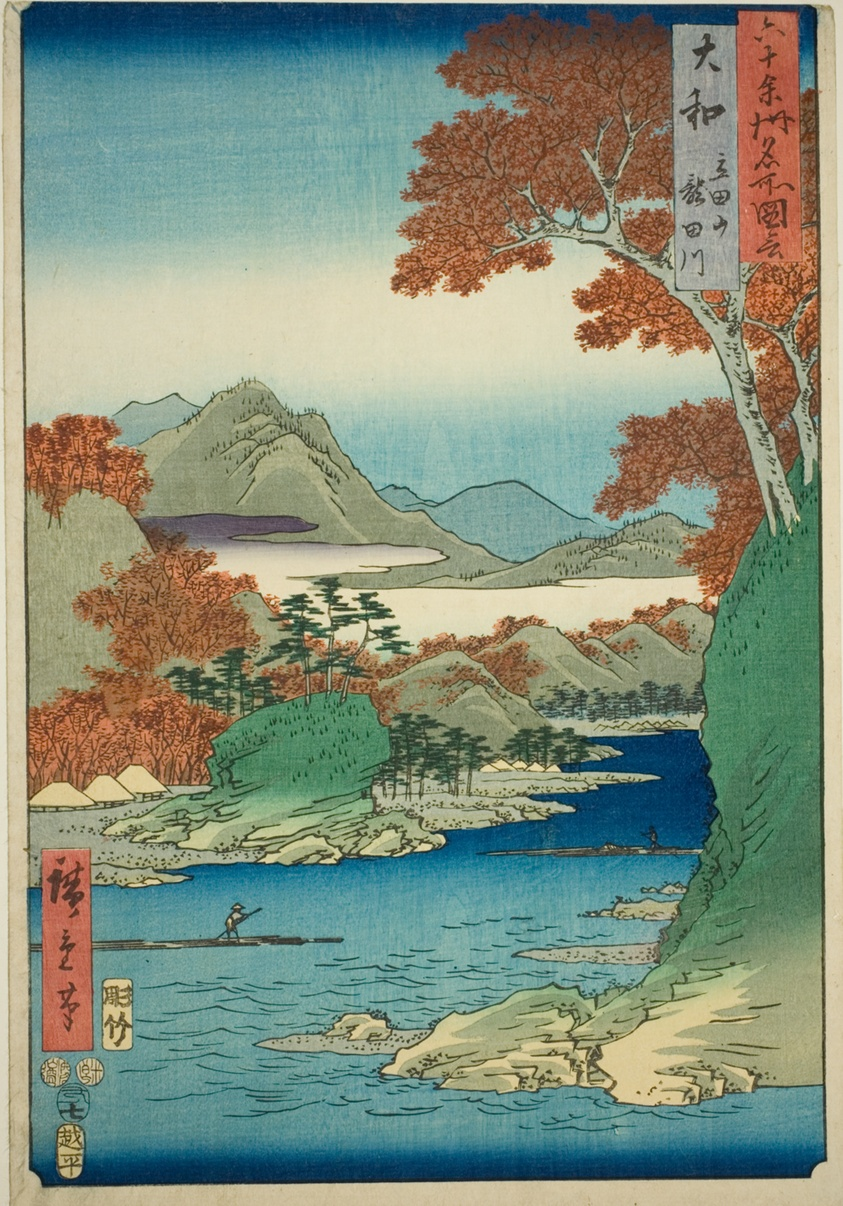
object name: Print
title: Yamato Province: Tatsuta Mountain and Tatsuta River (Yamato, Tatsutayama, Tatsutagawa), from the series "Famous Places in the Sixty-odd Provinces (Rokujuyoshu meisho zue)""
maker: Utagawa Hiroshige 歌川 広重; Japanese, 1797-1858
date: 1853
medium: Color woodblock print; oban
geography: Japan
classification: woodblock print; print; asian art